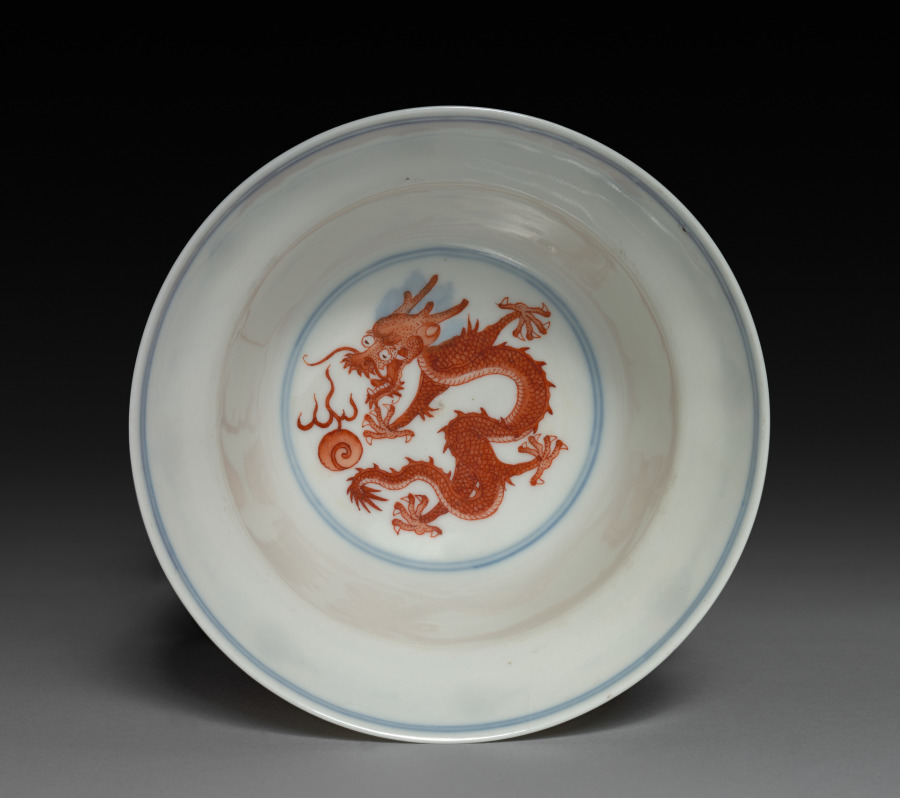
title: Bowl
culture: China, Jiangxi province, Jingdezhen kilns, Qing dynasty (1644-1911), Yongzheng mark and reign (1722-35)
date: 1723–35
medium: porcelain with doucai decoration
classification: Ceramic